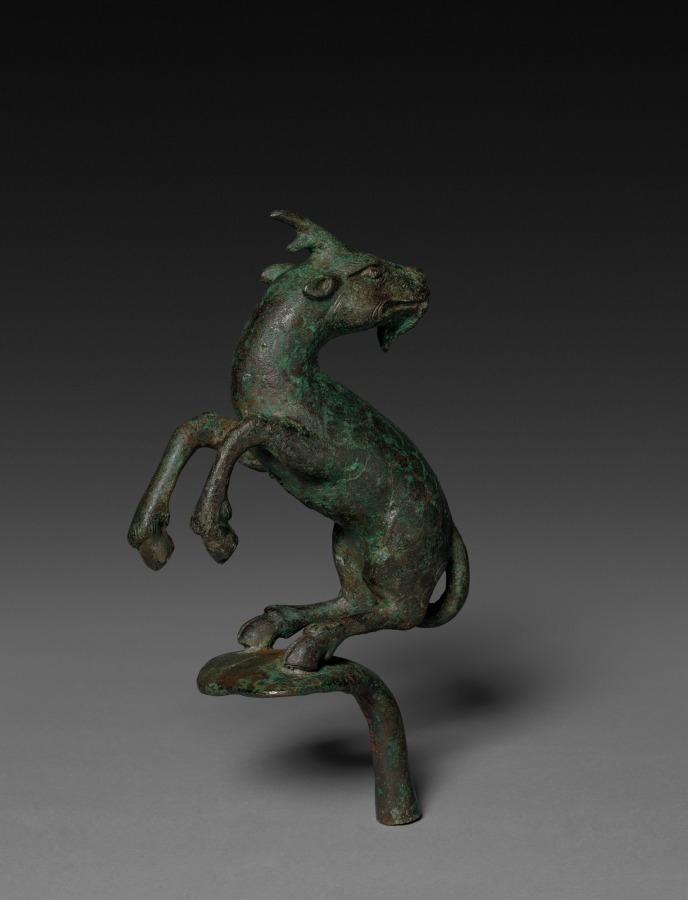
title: Mythical Animal: Tianlu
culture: China, Northern Song dynasty (960-1127)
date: 960–1127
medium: bronze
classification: Sculpture